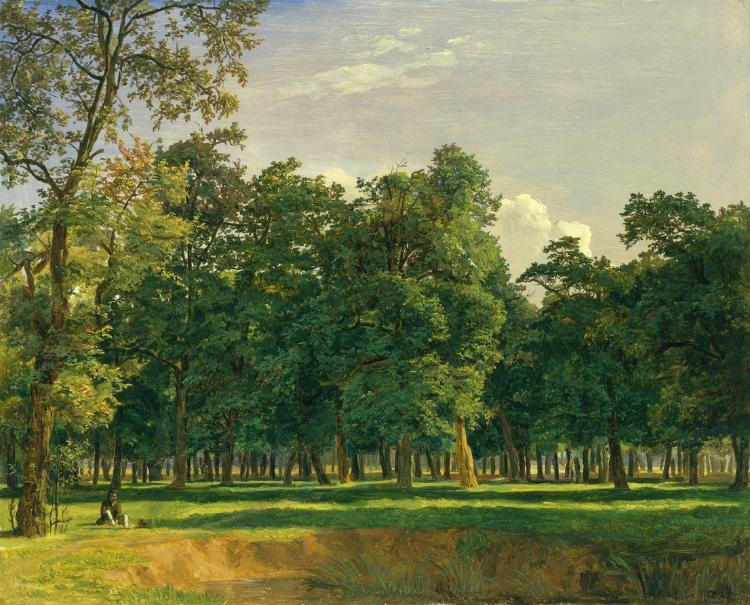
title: Prater Landscape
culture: Austria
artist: Ferdinand Georg Waldmüller (Austrian, 1793–1865)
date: c. 1831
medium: oil on wood panel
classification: Painting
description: In this depiction of the Prater, a large public garden in Vienna, Austria, a man sits beside a tree in the left foreground. Brilliant sunlight floods into the park illuminating a multitude of trees, their leaves rendered with fine detail. Although celebrated for his portraits, Waldmüller also produced closely observed landscapes and often visited the Prater to paint the majestic oak trees. He was forced to retire from his position as a professor at the Vienna Academy for rejecting doctrines of idealized, moralizing art in favor of truth to nature based on direct observation.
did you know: Waldmüller, best remembered as one of the most important Austrian landscape painters, financed his early training by painting candy pictures and portrait miniatures, teaching children, and designing theater sets.